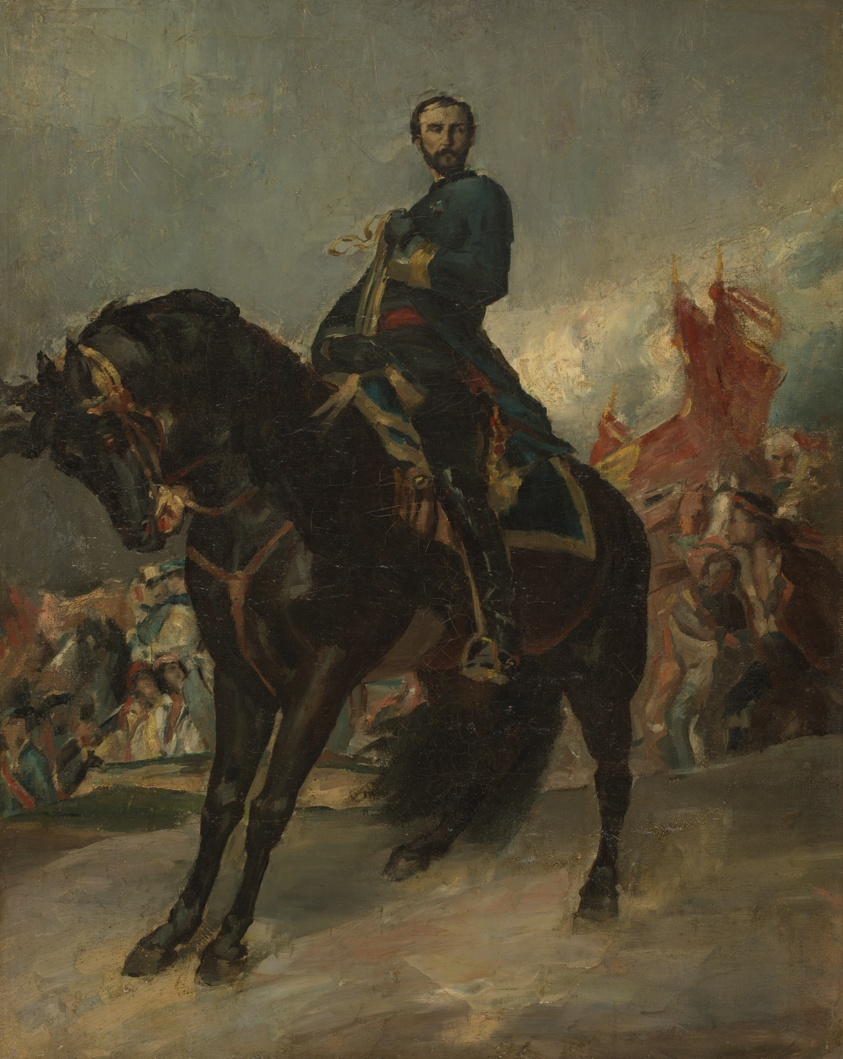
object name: Painting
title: General Juan Prim (1814-1870)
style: nineteenth century, 19th century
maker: Henri Regnault (French, 1843–1871)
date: 1868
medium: Oil on canvas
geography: France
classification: oil on canvas; paint; oil paintings (visual works); french; painting; european painting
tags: portraits: male subject, soldiers, sketch, portraits, portrait, man, horses, horse, flags, figures, battles